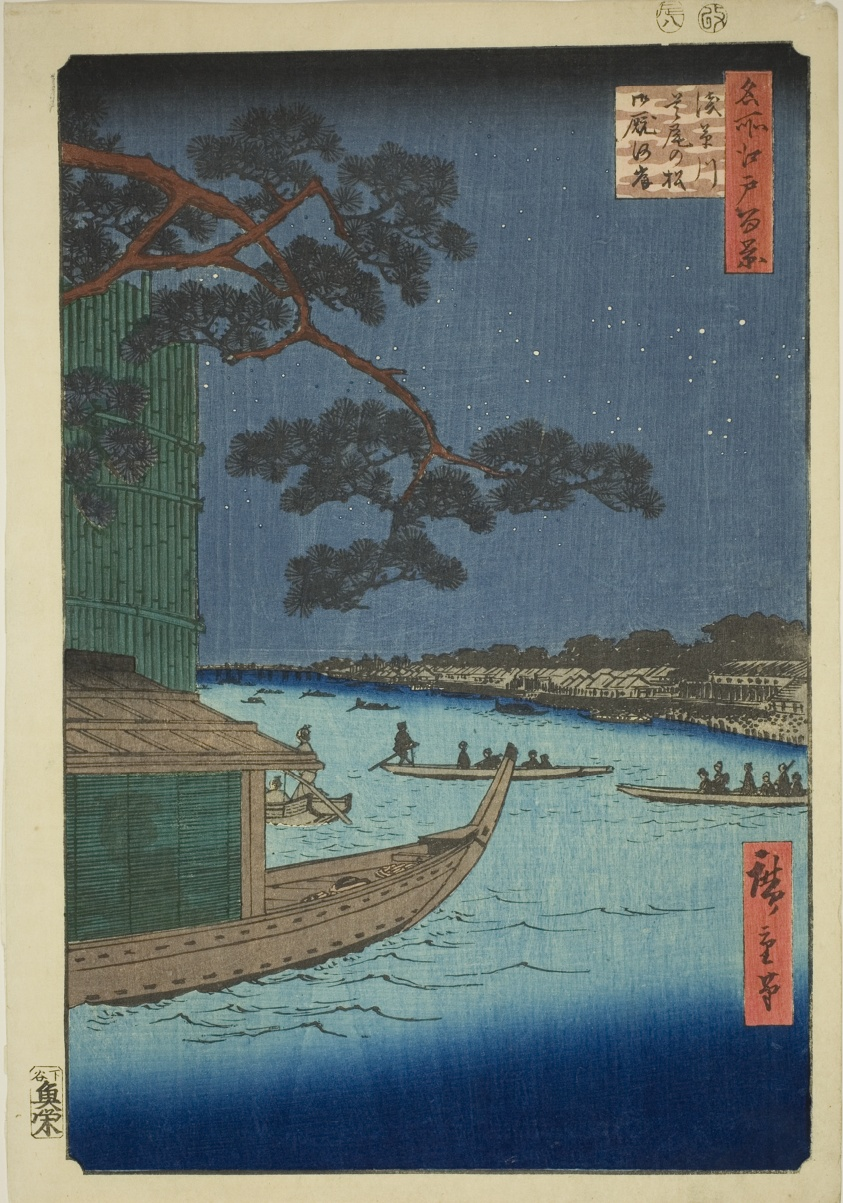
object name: Print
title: Pine of Success and Oumayagashi, Asakusa River (Asakusagawa Shubi no matsu Oumayagashi), from the series "One Hundred Famous Views of Edo (Meisho Edo hyakkei)"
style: Japanese (culture or style)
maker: Utagawa Hiroshige 歌川 広重; Japanese, 1797-1858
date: 1856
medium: Color woodblock print; oban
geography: Japan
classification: woodblock print; print; asian art